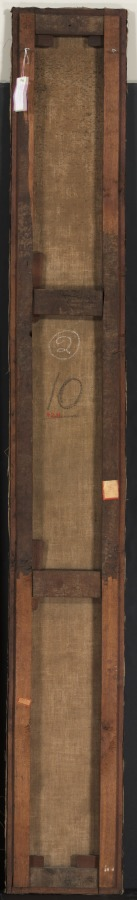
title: Decorative Panel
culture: France, 18th century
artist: Pierre Rousseau (French, 1751–1829)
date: 1790s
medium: oil on canvas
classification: Painting